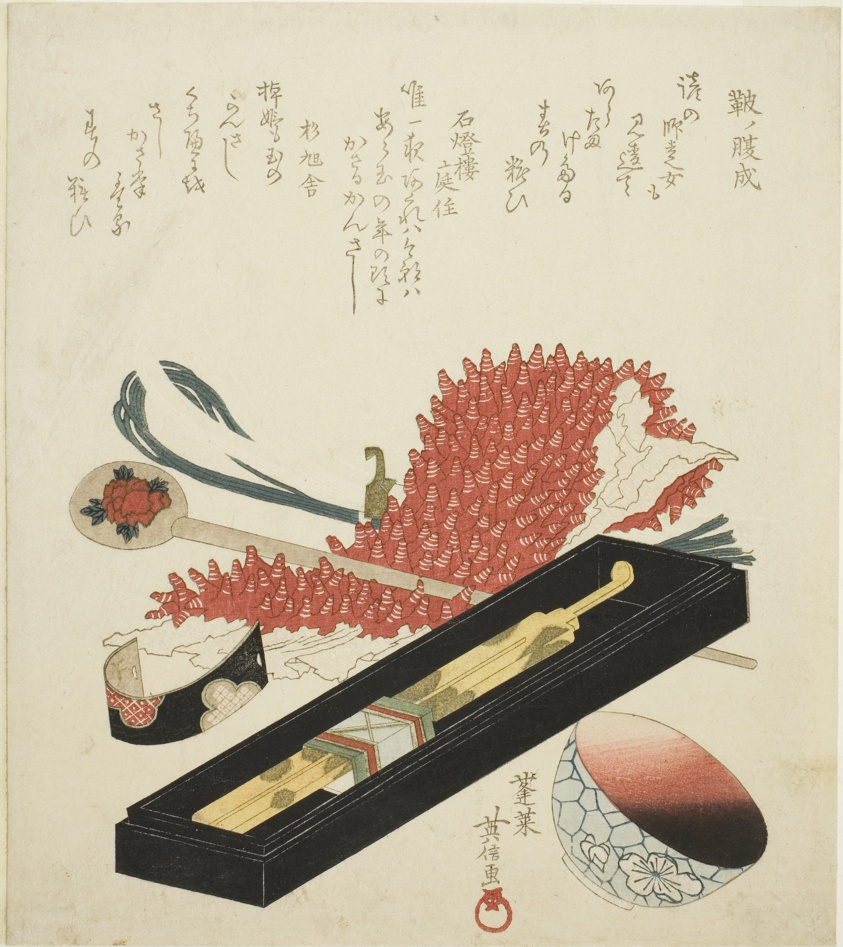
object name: Print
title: Hair Ornaments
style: Japanese (culture or style)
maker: Kikugawa Eishin (Hidenobu); Japanese, active c. 1804-30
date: c. 1804/30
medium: Color woodblock print; shikishiban, surimono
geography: Japan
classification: woodblock print; print; asian art